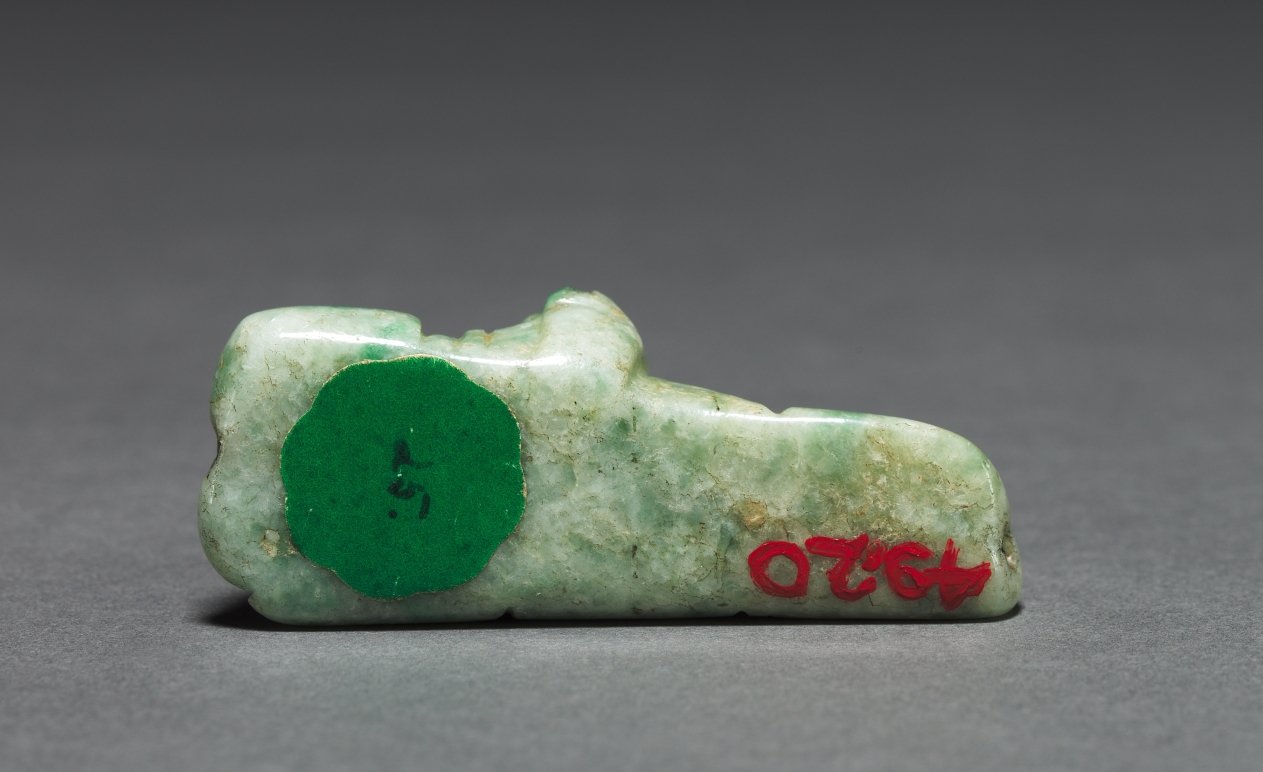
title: Pendant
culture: Maya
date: 250–900 CE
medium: jadeite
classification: Jade